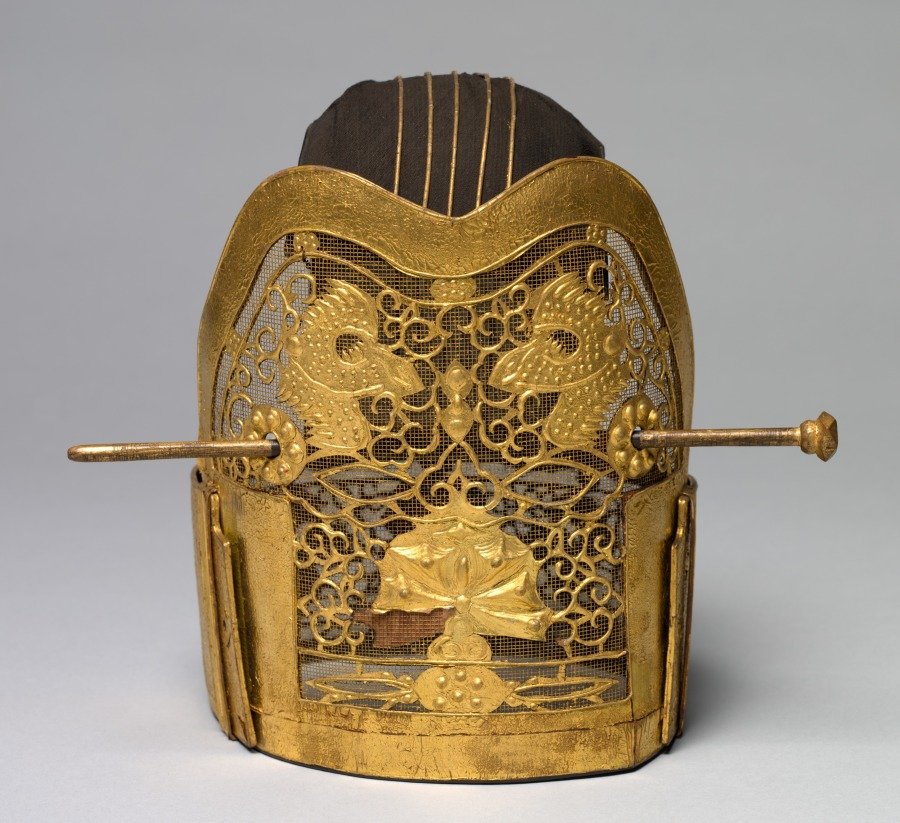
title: Crown for the Royal Ceremonial Costume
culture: Korea, Joseon dynasty (1392–1910)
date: late 1800s–early 1900s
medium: gilded paper, metal wire, and black silk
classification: Garment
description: This is a set of royal ceremonial robe and accessories worn by a high-ranking court official for attending special state ceremonies. The set consists of an inner coat, an outer coat, a skirt, a back apron, a crown, a pair of jade tassels, a tablet, and a belt.